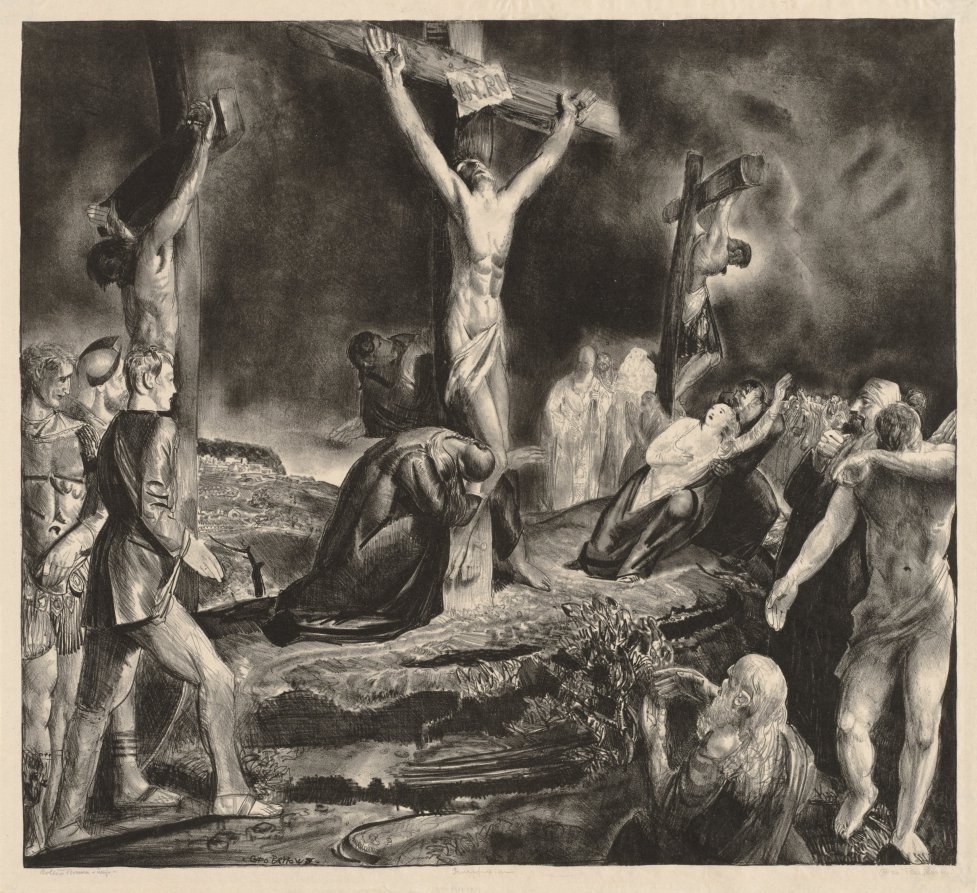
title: Crucifixion of Christ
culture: America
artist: George Bellows (American, 1882–1925)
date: 1923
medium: lithograph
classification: Print